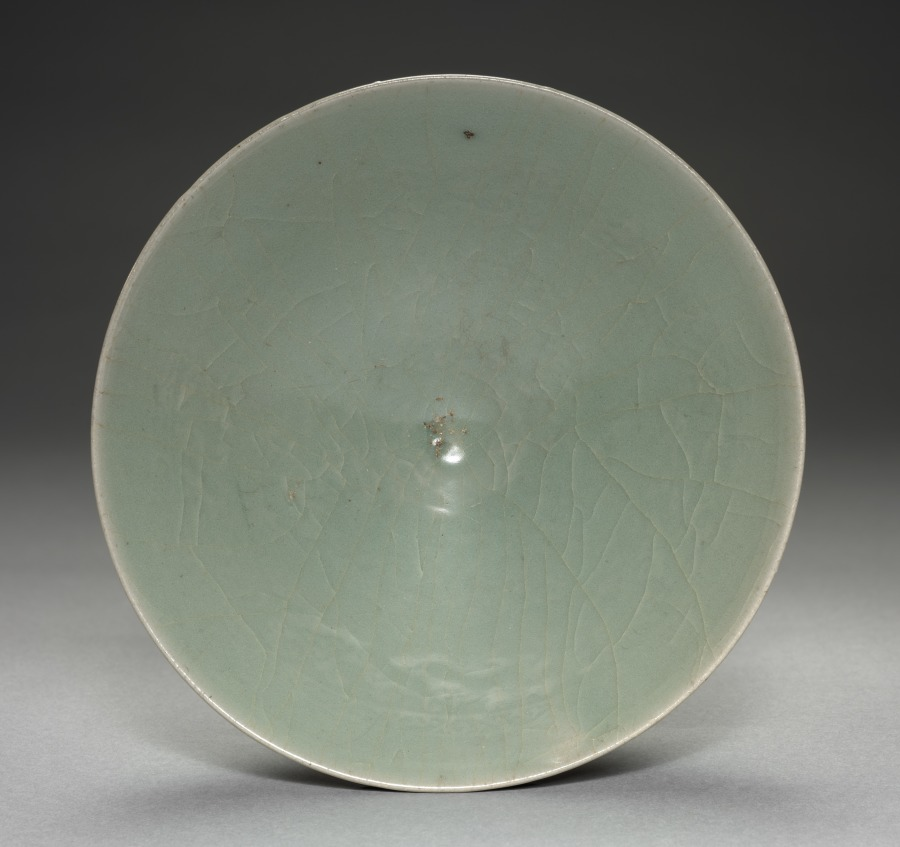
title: Bowl with Cloud Design in Relief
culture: Korea, Goryeo dynasty (918–1392)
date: 1100s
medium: glazed porcelain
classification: Ceramic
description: As early as the 600s, the practice of drinking tea and wine became an important part of elite leisure culture in Korea. A wide bowl like this example was especially suitable for drinking powdered tea shaved from a compressed tea cake, the most commonly enjoyed type during the Goryeo period. The pale bluish green glaze indicates that this tea bowl was created in the 12th century, the time when the production of celadon reached its technical peak.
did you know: Kangjin and Buan kilns in Jeolla province were the two major production centers for celadon wares during the Goryeo period (918–1392).